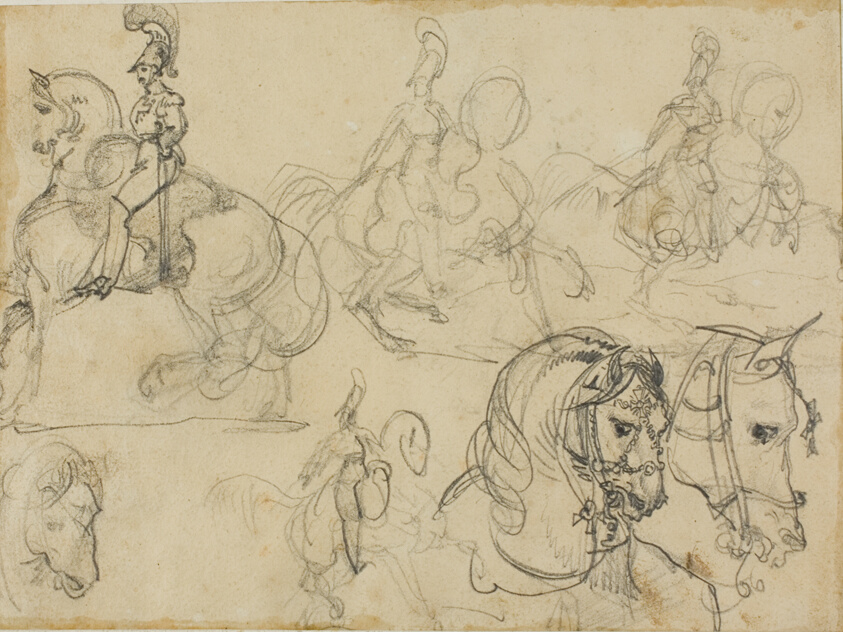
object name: Drawing and Watercolor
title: Sketches of Mounted Carabiniers and Heads of Horses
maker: Jean Louis André Théodore Géricault (French, 1791-1824)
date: 1813/14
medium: Graphite on tan wove paper, perimeter mounted on ivory laid paper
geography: France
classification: graphite; drawings (visual works); prints and drawing